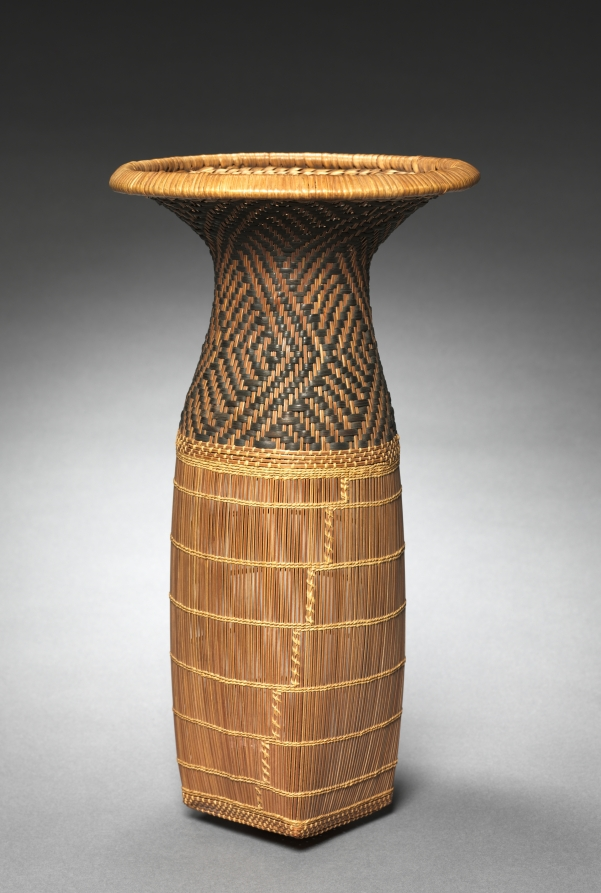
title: Sifting Basket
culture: Africa, Central Africa, Democratic Republic of the Congo or Angola, possibly Chokwe-style maker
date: before 1915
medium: Plant fibers and dye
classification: Tool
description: The Chokwe pounded maize into a course flour and then sifted it in order to separate the finest flour for cooking. This domestic object exhibits a refined, elegant artistry in its proportion, shape, and integrated woven textures.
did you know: F. M. Rapp––who acquired this basket in Congo while working for a diamond mine––attended the Case School of Applied Science in Cleveland.